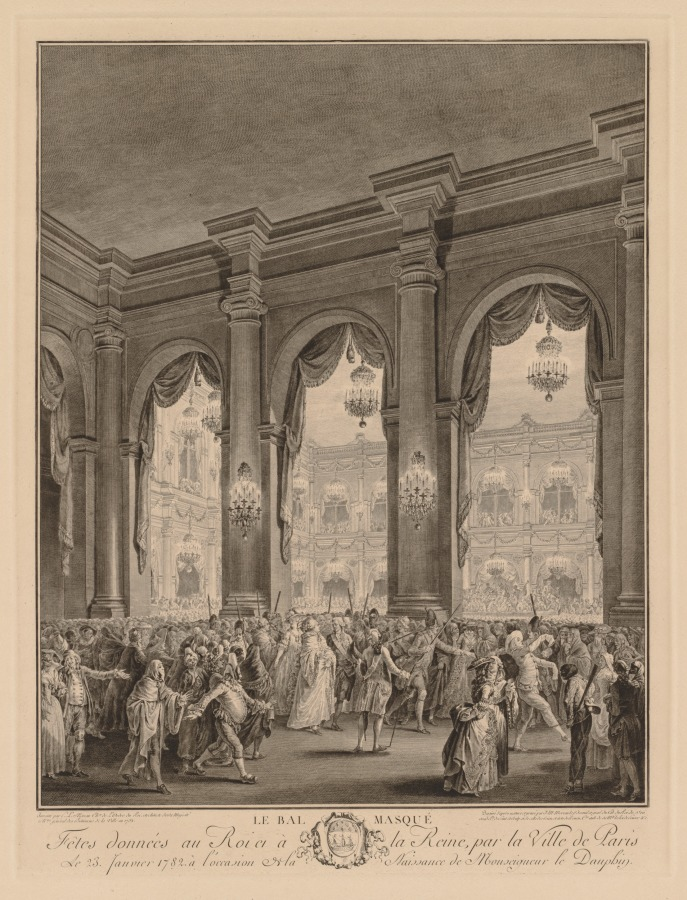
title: Masked Ball at the Hôtel de Ville, January 23, 1782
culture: France, 18th century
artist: Jean-Michel the Younger Moreau (French, 1741–1814)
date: 1782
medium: engraving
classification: Print